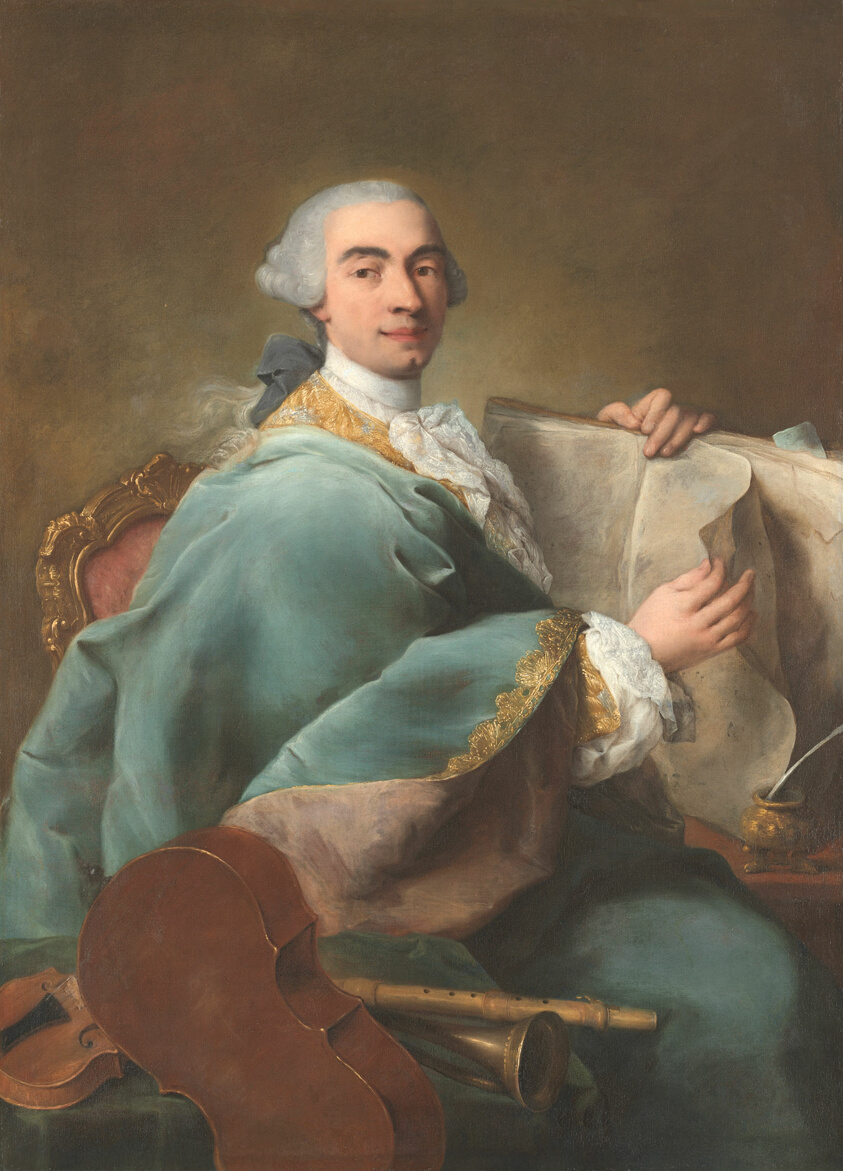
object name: Painting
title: Portrait of a Musician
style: 18th Century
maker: Alessandro Longhi (Italian, 1733–1813)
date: c. 1770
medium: Oil on canvas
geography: Italy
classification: painting; Italian; oil on canvas; oil paintings (visual works); paint; portrait; european painting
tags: portraits: male subject, man, violins, chair, book, bows, musicians, musical instruments, music, blue (color), blue, portraits, portrait